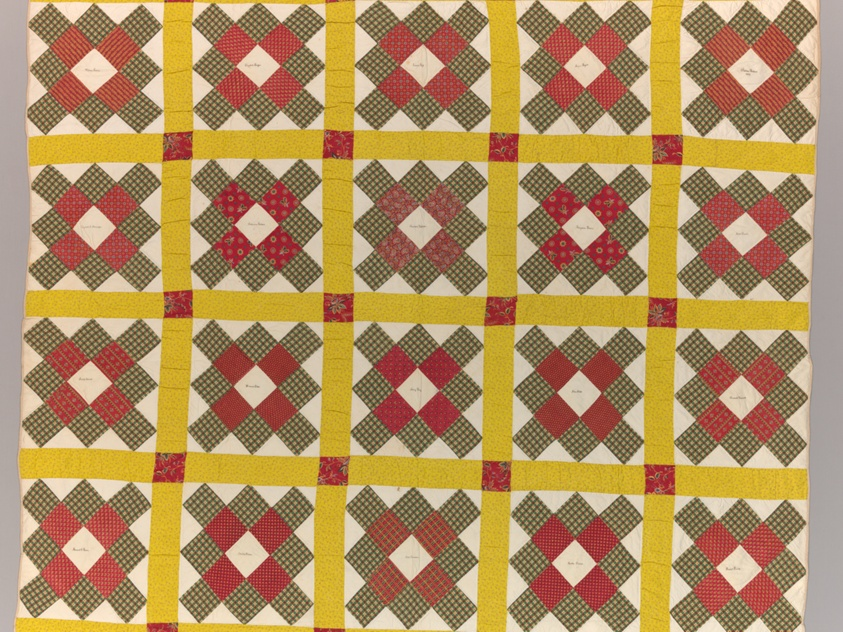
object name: Textile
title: Bedcover ("Album Patch" or "Signature" Quilt)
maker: Possibly Hunderdon County, New Jersey, United States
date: 1847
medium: Cotton, plain weaves; printed; quilted; backed and edged with cotton, plain weave; pieced; printed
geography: United States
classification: needlework - quilt; textile